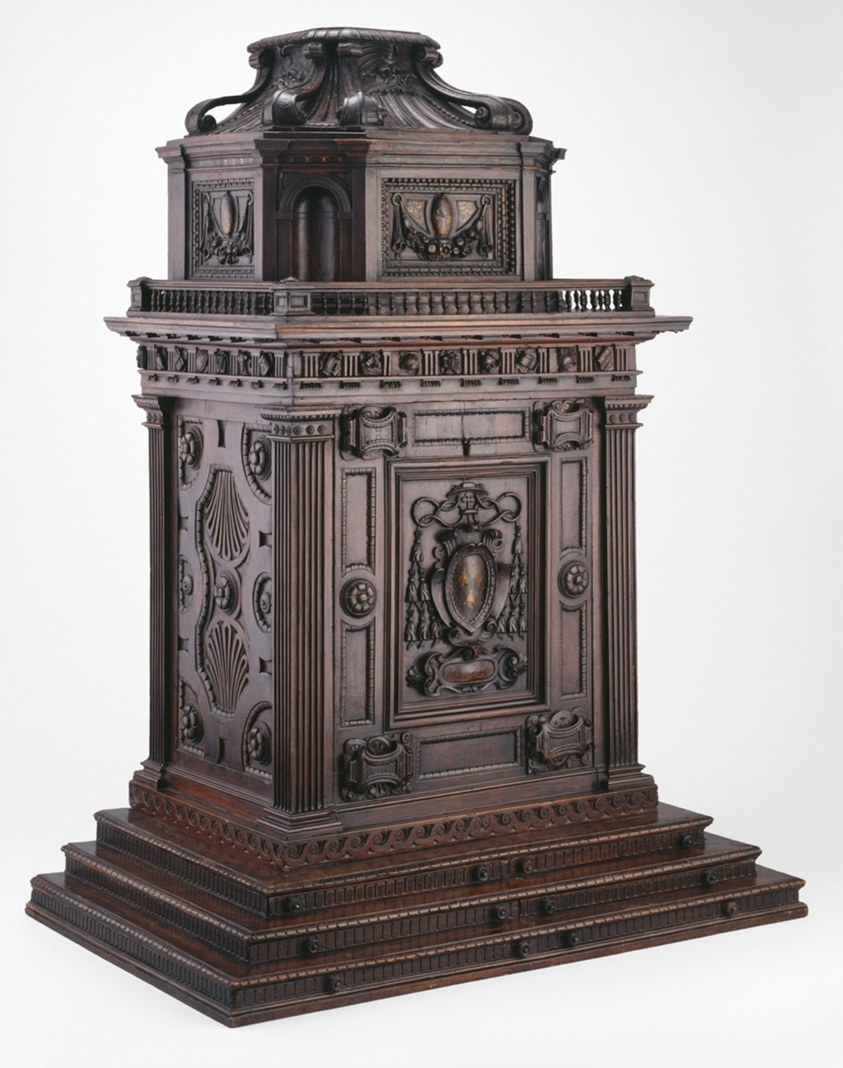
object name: Furniture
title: Coin Cabinet for a Member of the Barberini Family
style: Baroque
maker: Italian; Rome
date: 1630–34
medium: Cypress, poplar, paint, silk, velvet, iron, bronze, and gilding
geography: Italy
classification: cabinet; case furniture; furniture; european decorative arts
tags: furniture, cabinets, coins, medals, Rome